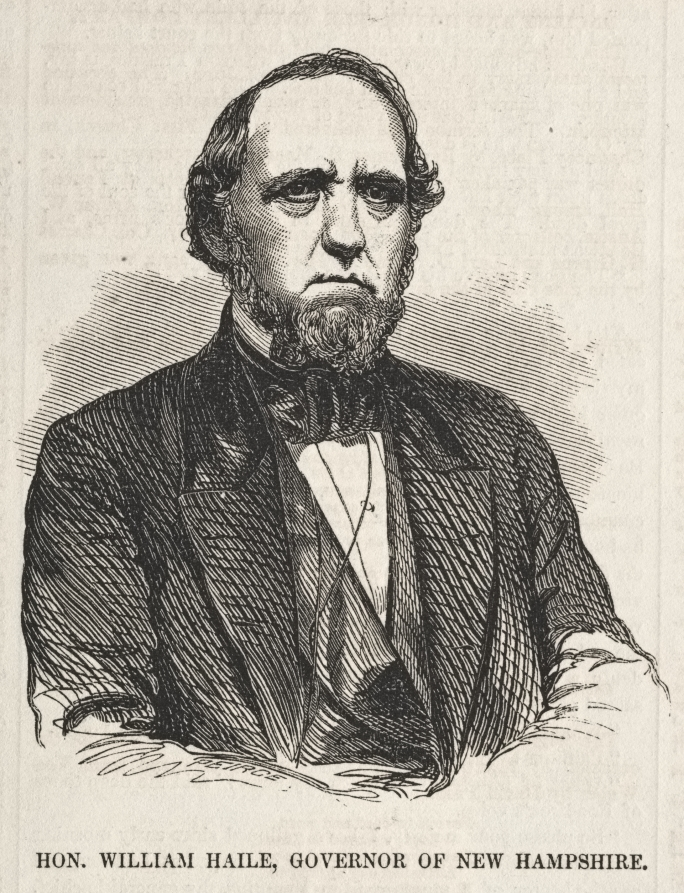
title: Hon. William Haile, Governor of New Hampshire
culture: America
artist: Winslow Homer (American, 1836–1910)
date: 1857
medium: wood engraving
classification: Print